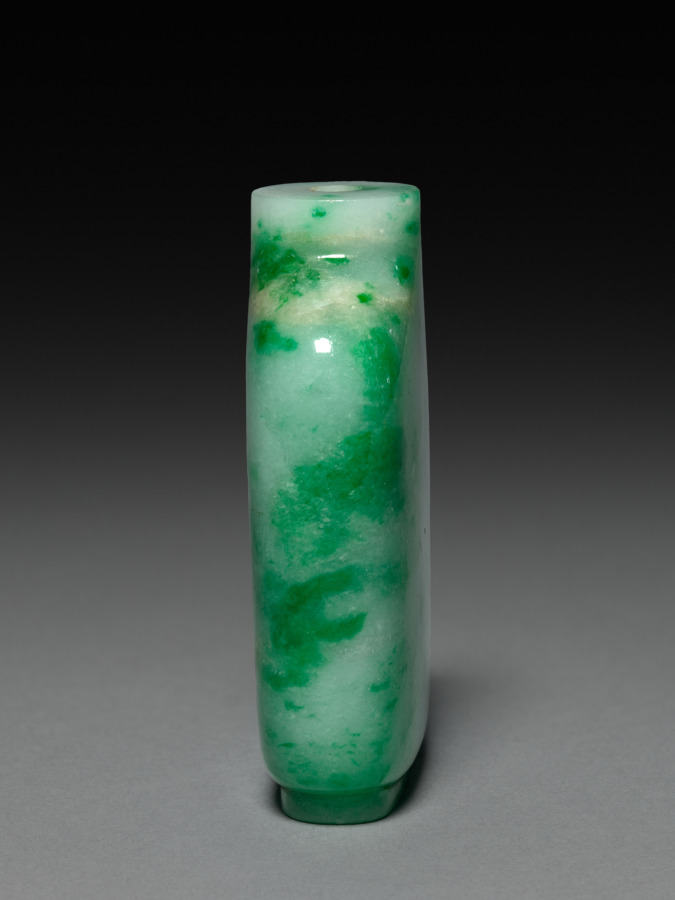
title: Snuff Bottle with Stopper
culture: China, Qing dynasty (1644-1911)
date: 1800s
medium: jade and rose quartz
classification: Jade